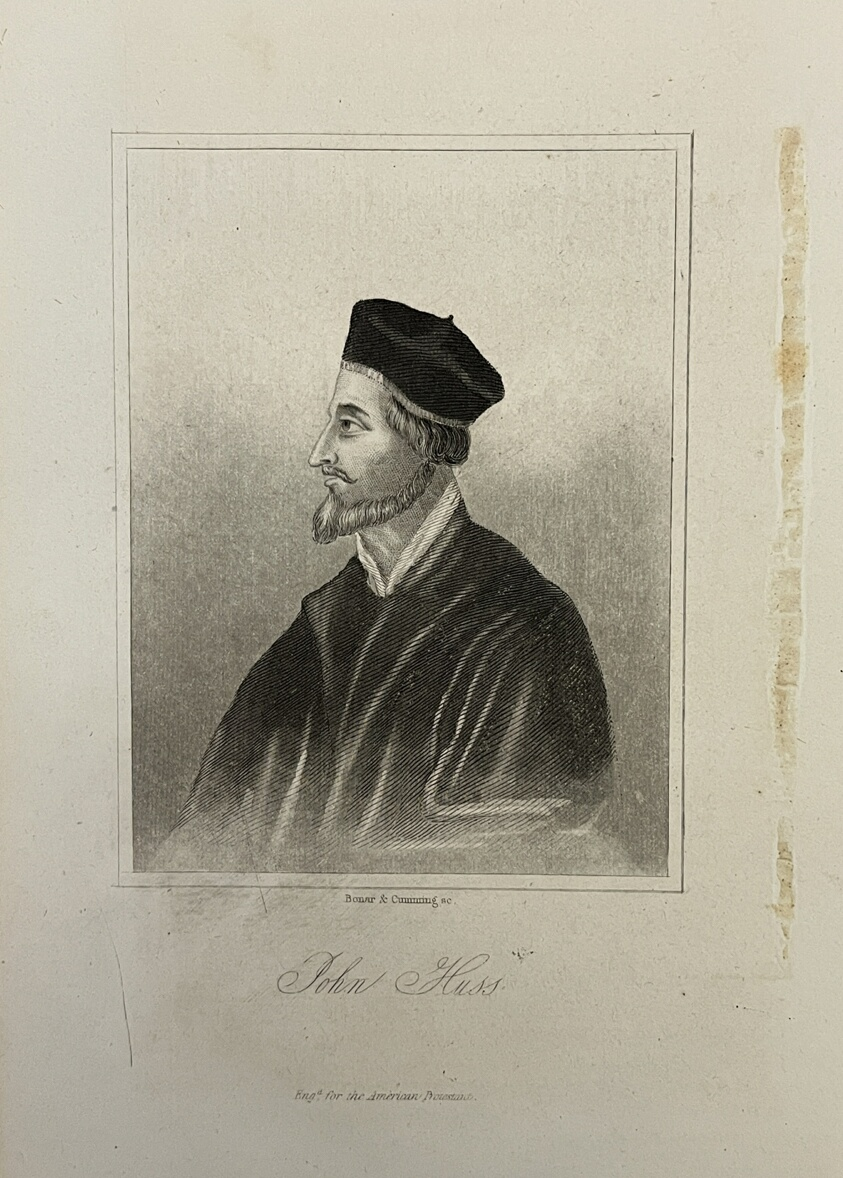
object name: Print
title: John Huss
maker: Thomas Bonar (American, 19th century); and Bonar & Cumming (American, 19th century)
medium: Steel engraving on paper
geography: United States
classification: reproduction; print; prints and drawing